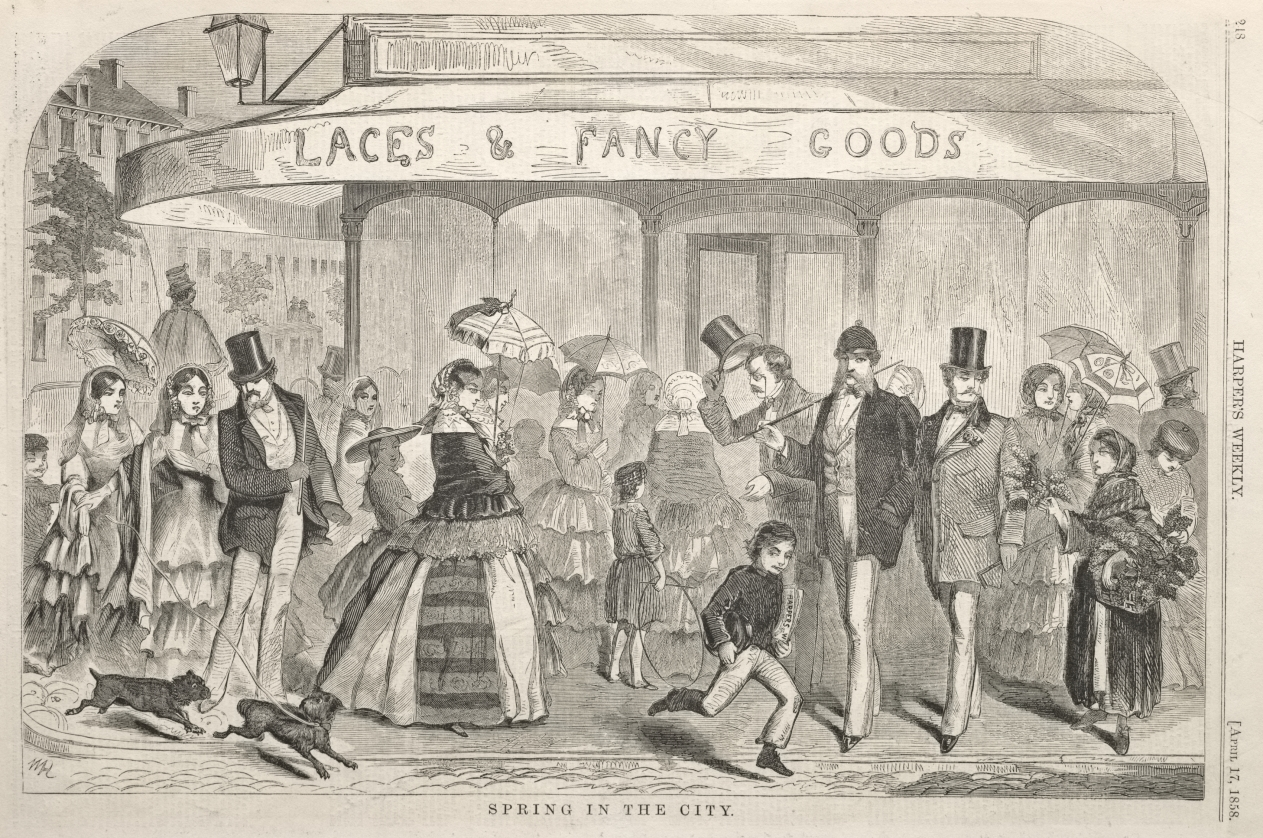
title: Spring in the City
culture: America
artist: Winslow Homer (American, 1836–1910)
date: 1858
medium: wood engraving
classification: Print